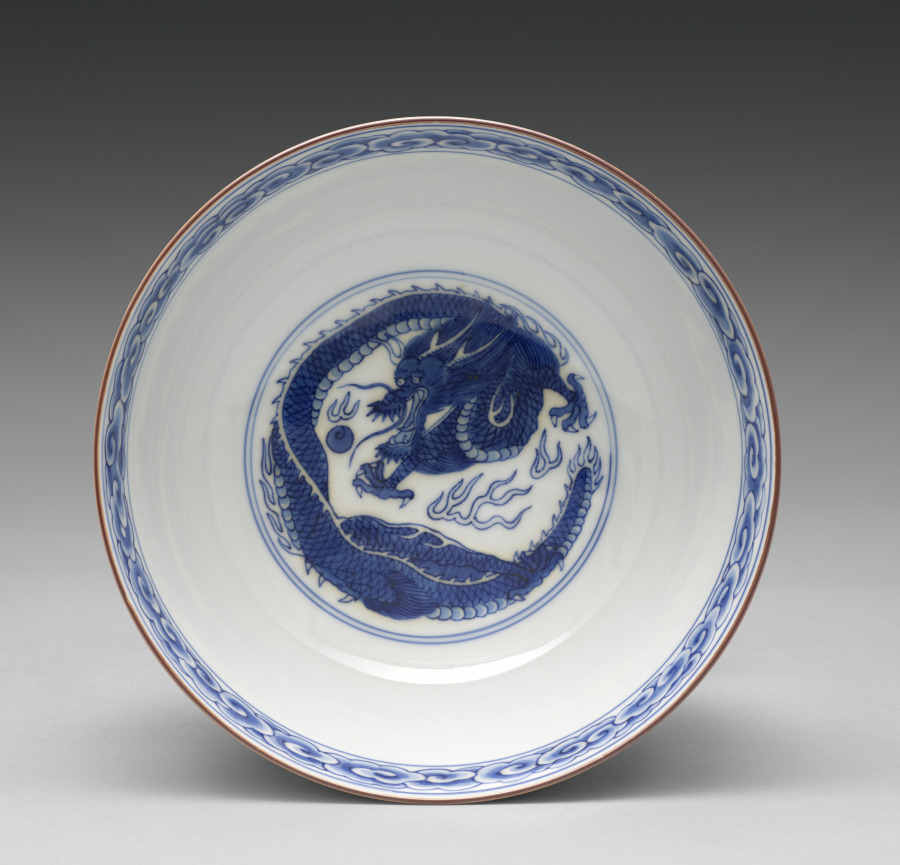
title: Bowl with Dragon Roundels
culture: Japan, Meiji period (1868–1912)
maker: Seifū Yohei III (Japanese, 1851–1914)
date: 1897–1914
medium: Porcelain with underglaze blue, iron oxide, and yellow glaze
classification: Ceramic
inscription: 清風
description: While this bowl has no box, it is attributed to Yohei III based in part on the style of the signature on its base. Below the rim, the bowl’s interior has a ring of clouds in underglaze blue. On the outside, bright yellow is combined with roundels of dragons capturing flaming jewels, painted under the glaze in blue, while the inside has a single dragon roundel in underglaze blue against a white ground. The work’s bold decorative scheme is more in keeping with what might be expected from the high-output studio of Miyagawa Kozan in Yokohama, whose products were designed for mass appeal. A similar bowl is in the collection of the Museum of Ceramic Art, Hyogo.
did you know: Seifū Yohei III was inspired by the Chinese mythical animals and motifs with magical symbolism—including clouds and fungi—that were common on porcelain objects made at Jingdezhen in China during the Ming dynasty (1368–1644) and then exported around the world.